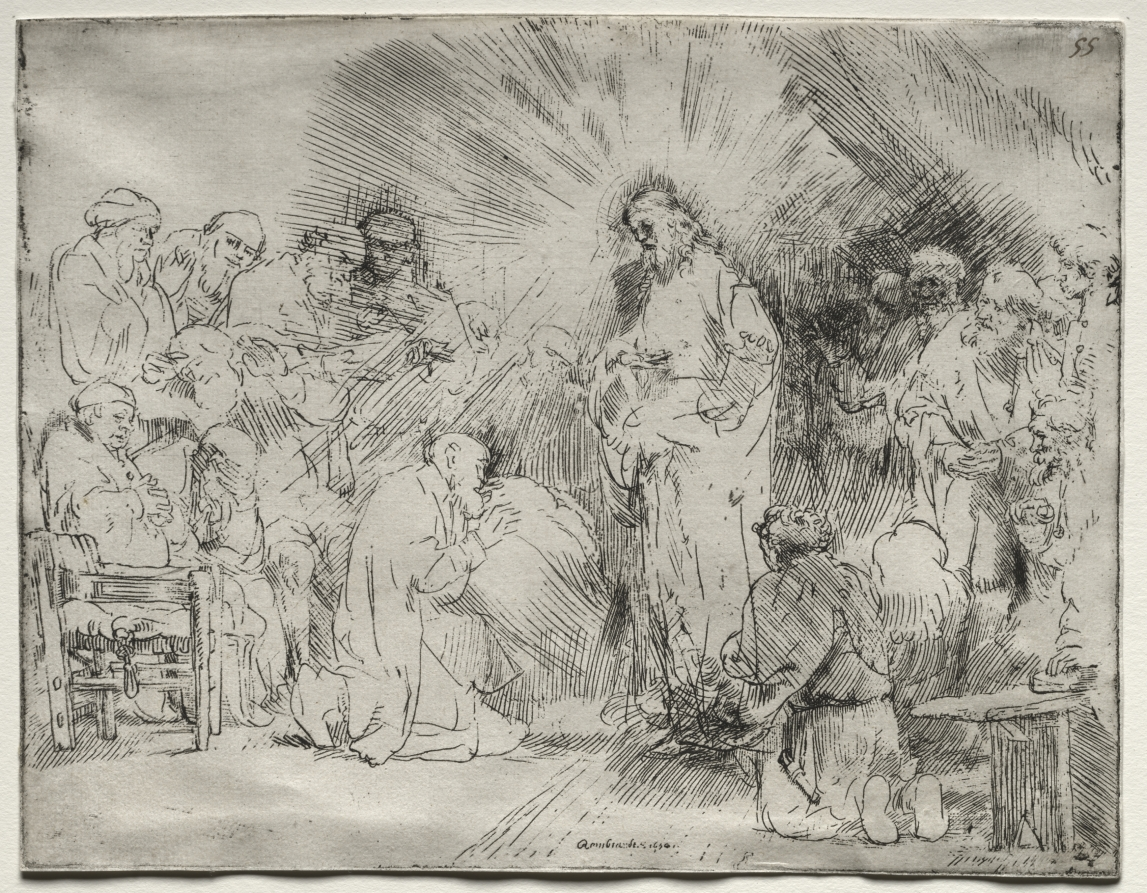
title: Christ Appearing to the Apostles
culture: Netherlands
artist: Rembrandt van Rijn (Dutch, 1606–1669)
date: 1656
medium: etching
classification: Print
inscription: lower center, in plate: Rembrandt. f.1656; upper right, in pen and brown ink: 55 ; VERSO, upper left, in graphite: 9988 ; upper left, in graphite: 76 ; in bottom half, in pen and brown ink: Claude Augustus Mariette 1691-; lower right, in graphite: G. g.